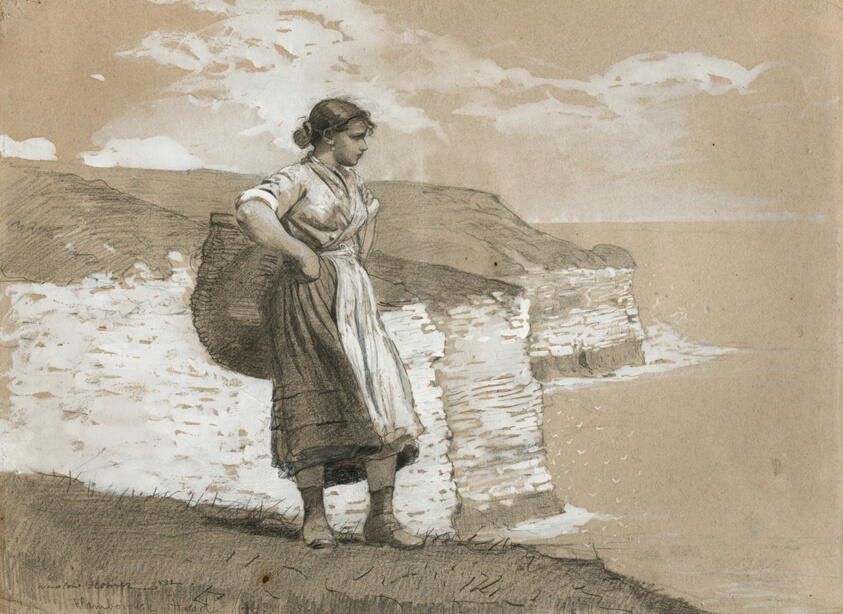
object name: Drawing and Watercolor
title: Flamborough Head, England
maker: Winslow Homer (American, 1836-1910)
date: 1882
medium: Graphite and opaque white watercolor on medium thick, slightly textured, tan laid paper with red and blue fibers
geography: United States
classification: watercolor; drawings (visual works); prints and drawing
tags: women, people, seascapes